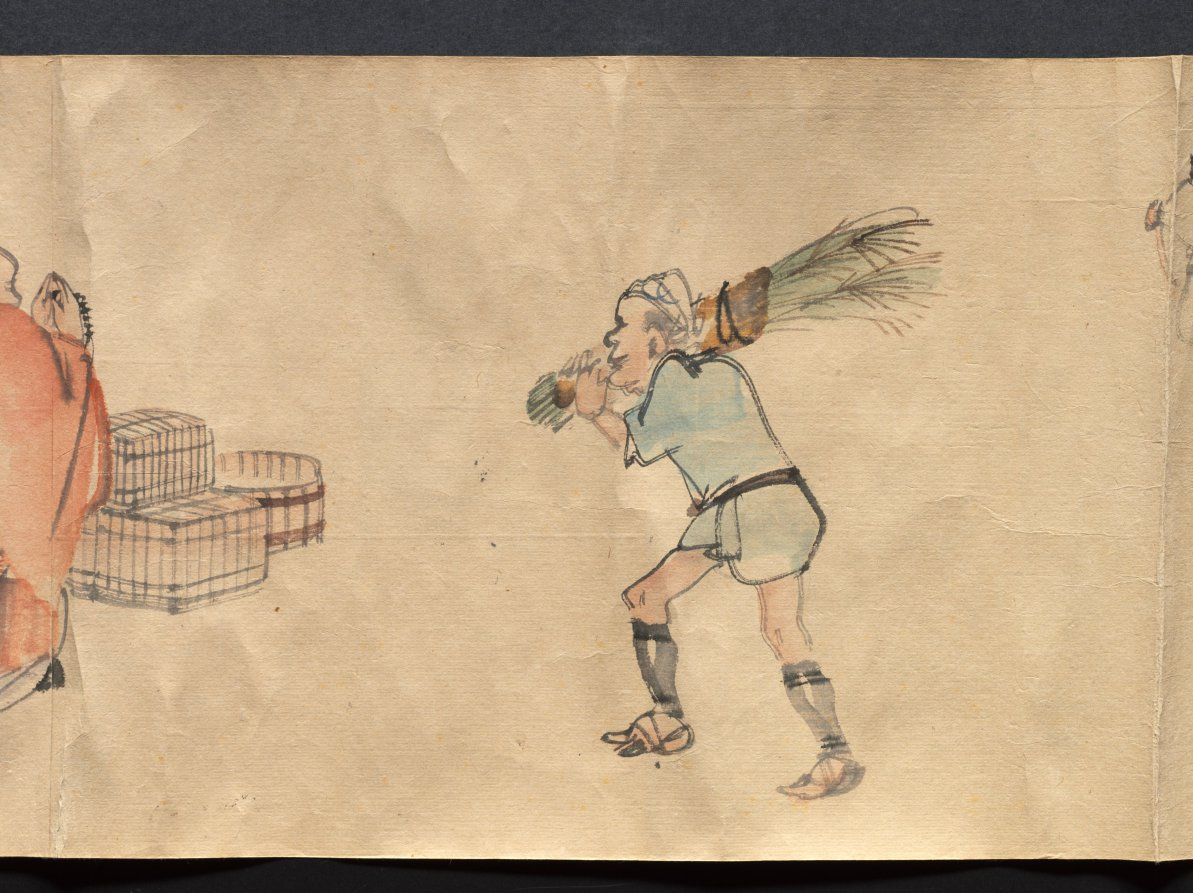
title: Festival Scenes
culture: Japan, Edo period (1615–1868)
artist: Suzuki Nanrei (Japanese, 1775–1844)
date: c. 1795–1844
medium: handscroll; ink and color on paper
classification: Painting